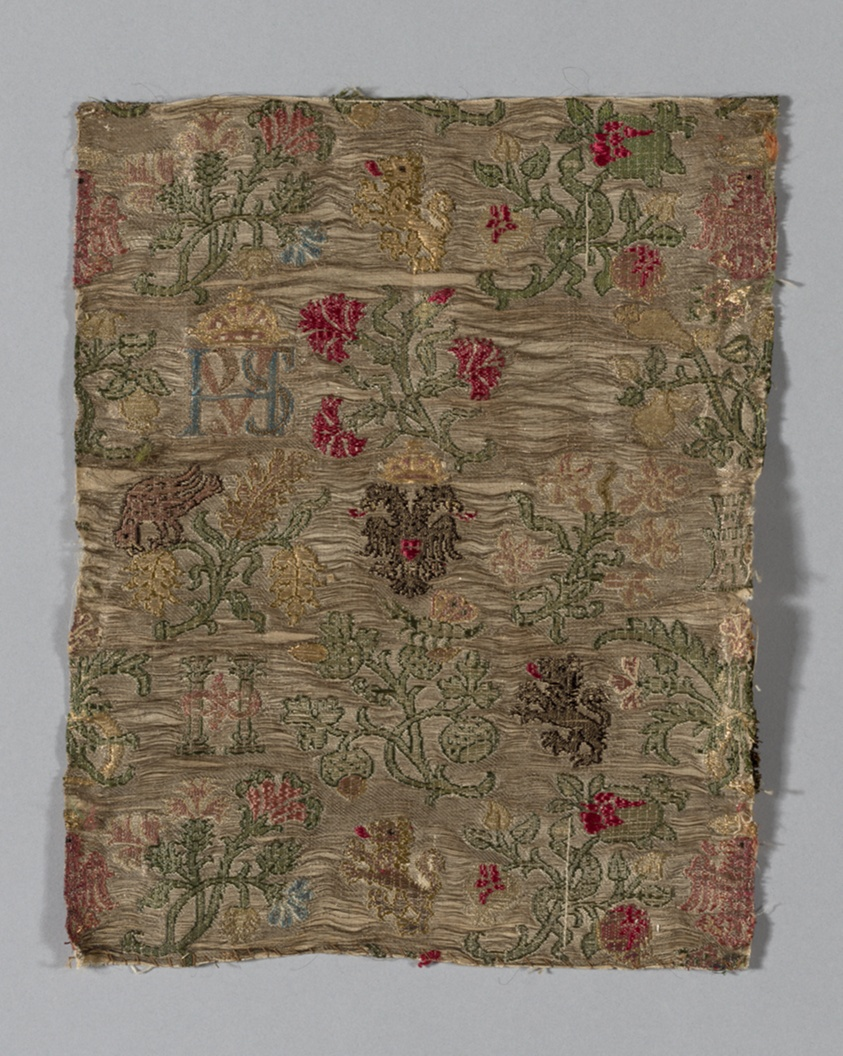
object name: Textile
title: Fragment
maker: Spain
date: 1601/25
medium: brocaded silk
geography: Spain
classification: textile; weaving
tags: lions, Monograms, crowns, eagles, birds, flowers